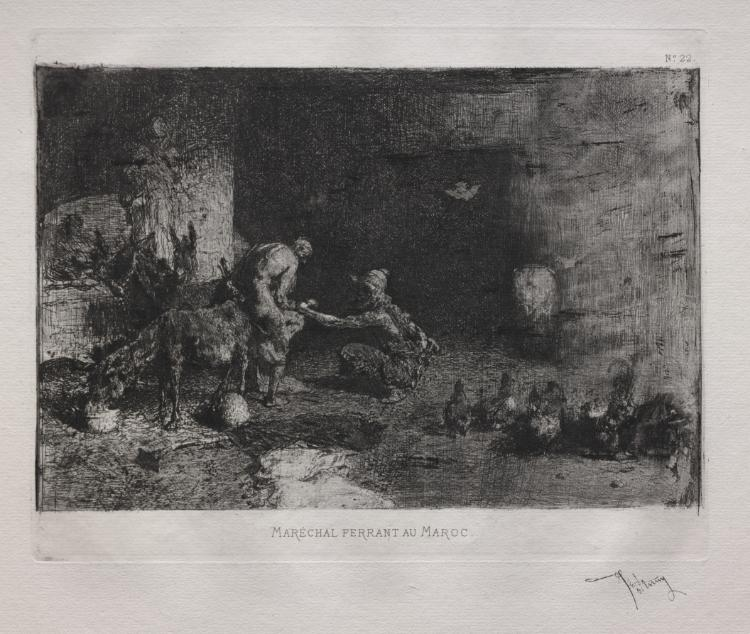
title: Shoeing a Mule in Morocco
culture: Spain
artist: Mariano Fortuny (Spanish, 1838–1874)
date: 1875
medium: etching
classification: Print